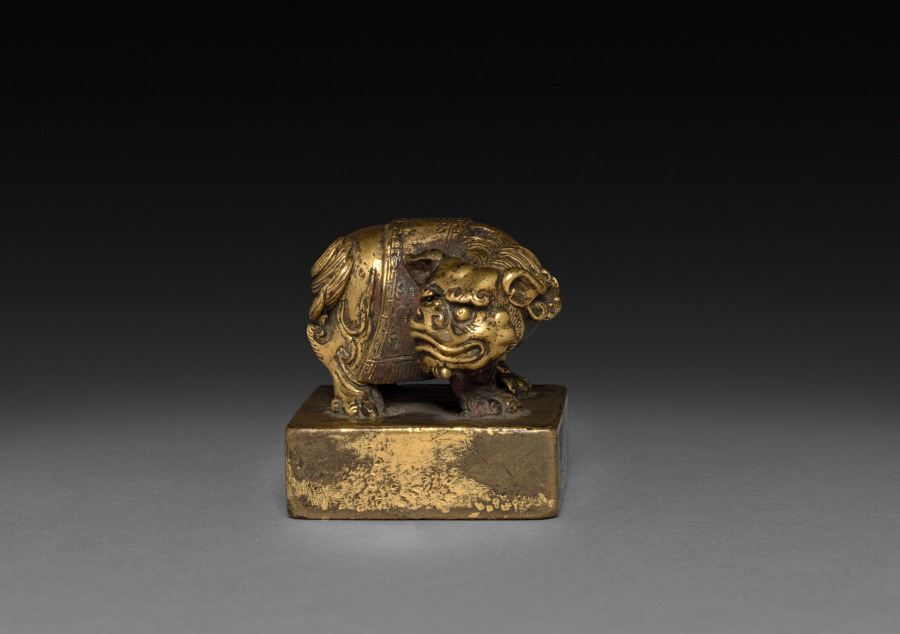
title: Seal, Lion-Dog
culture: China, Song dynasty (960-1279)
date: 960– 1279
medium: gilt bronze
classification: Metalwork